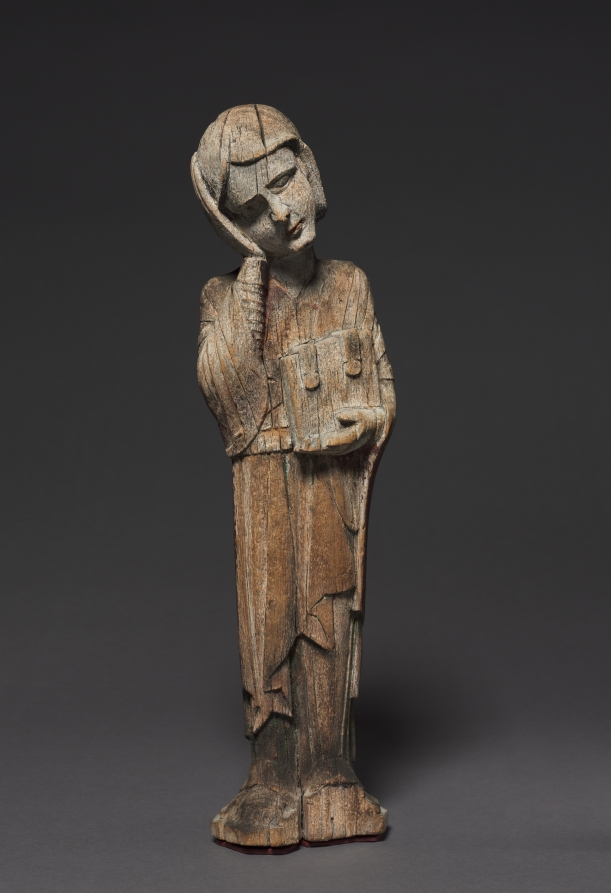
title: Mourning Saint John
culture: Austria, Region of Salzburg, Lungau?, 13th century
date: c. 1240–1260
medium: painted wood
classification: Sculpture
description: These traditional devotional figures at one time formed a Crucifixion group with a Crucified Christ (now lost). The ensemble may have been mounted high above the entrance to the sanctuary of a church on a barrier called a rood beam, beyond which lay people were not allowed. Crucifixion groups were common in medieval churches where they symbolized the sacrifice and real presence of Christ in the Mass.